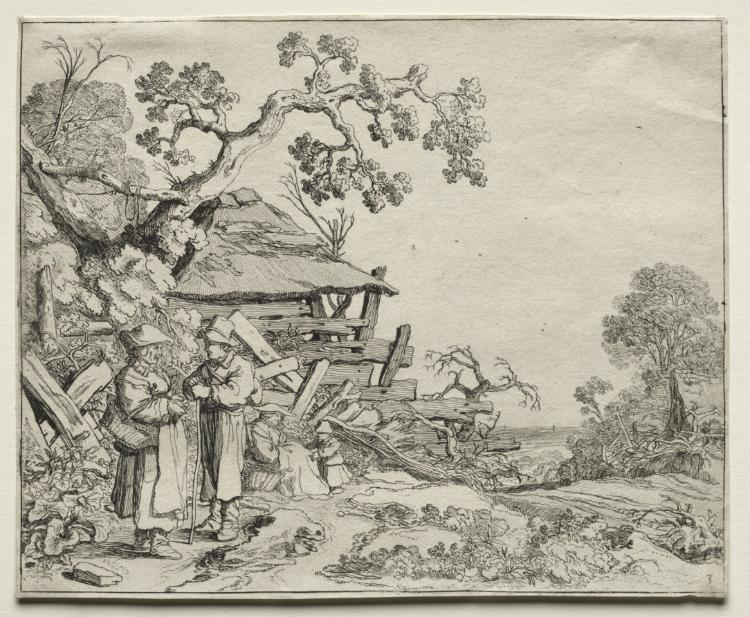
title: Landscape with Two Peasants Conversing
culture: Netherlands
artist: Pieter Molyn (Dutch, 1595–1661)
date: 1626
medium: etching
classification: Print